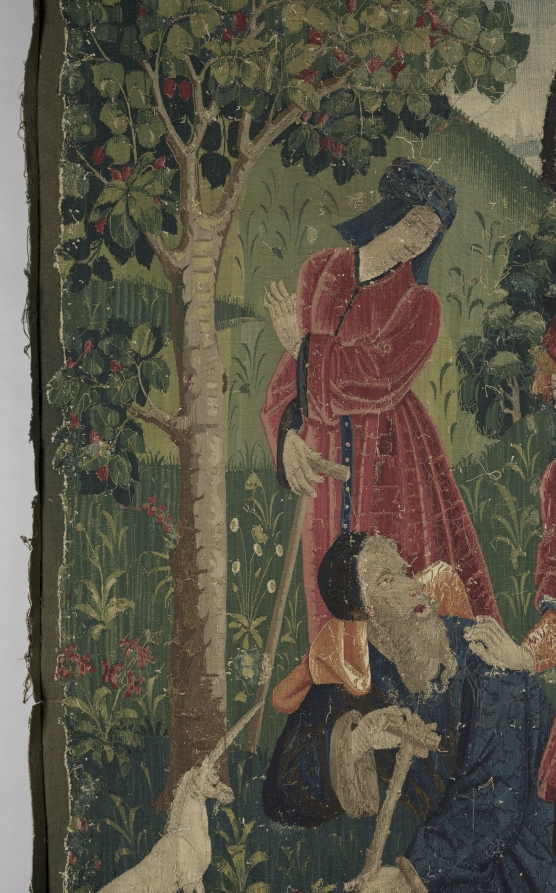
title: Time (from Chateau de Chaumont set)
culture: France, Lyon(?), early 16th century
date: 1512–15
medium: silk and wool; tapestry weave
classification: Tapestry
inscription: French verse in Gothic letters translates as follows: "One sees the weather adorned in green, Sometimes as pleasing as an angel; To suddenly change and be quite strange, The weather never stays the same."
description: Pierre Sala, who likely commissioned the set, is portrayed as the richly attired central figure offering a bouquet, a symbol of knowledge, to Éléonore, his daughter. Éléonore is pregnant, revealed by her upturned skirt and the persimmon in her husband Hector’s hand. Hector’s mother, Marguerite, in dark attire, will wed the widowed Sala in 1519. They appear in front of the royal chateau of Blois. The figures at the right convey Sala’s advice to his children. Time (the old man with the staff) with Clio, the Muse of History, standing on his shoulders, is being attacked by a Herculean youth wielding a stick. With this allegory, Sala is explaining that youth is ignorant of the complexities of life and time. The small unicorn at the far right represents the soul. The verse in Old French at the top refers to changing time: One sees Time adorned with green foliage, Sometimes as pleasant as an angel, Then suddenly change and become quite strange. Never does Time persist in one state.